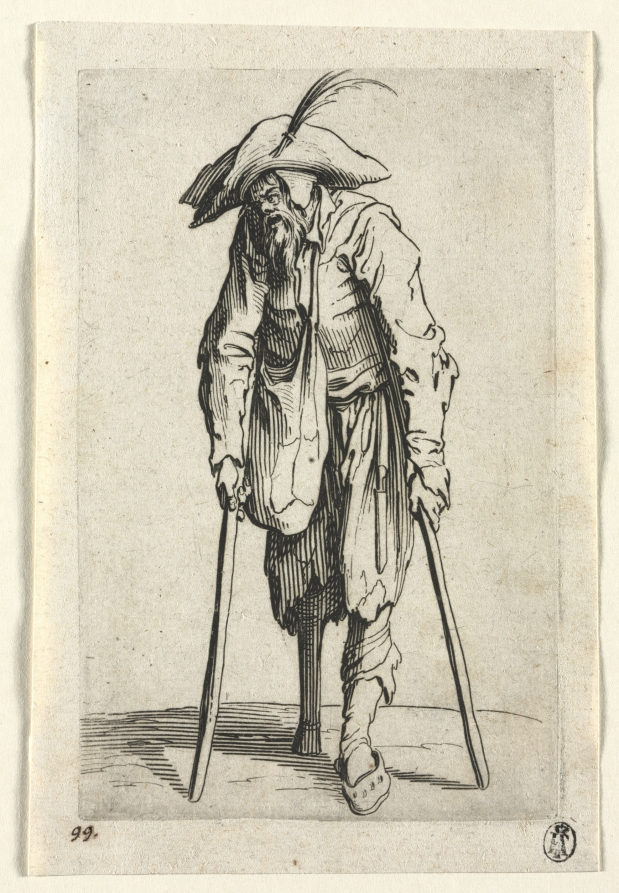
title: The Beggars: Beggar with Wooden Leg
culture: France, 17th century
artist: Jacques Callot (French, 1592–1635)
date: c. 1623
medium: etching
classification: Print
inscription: Inscribed lower left in pen and brown ink: "99."